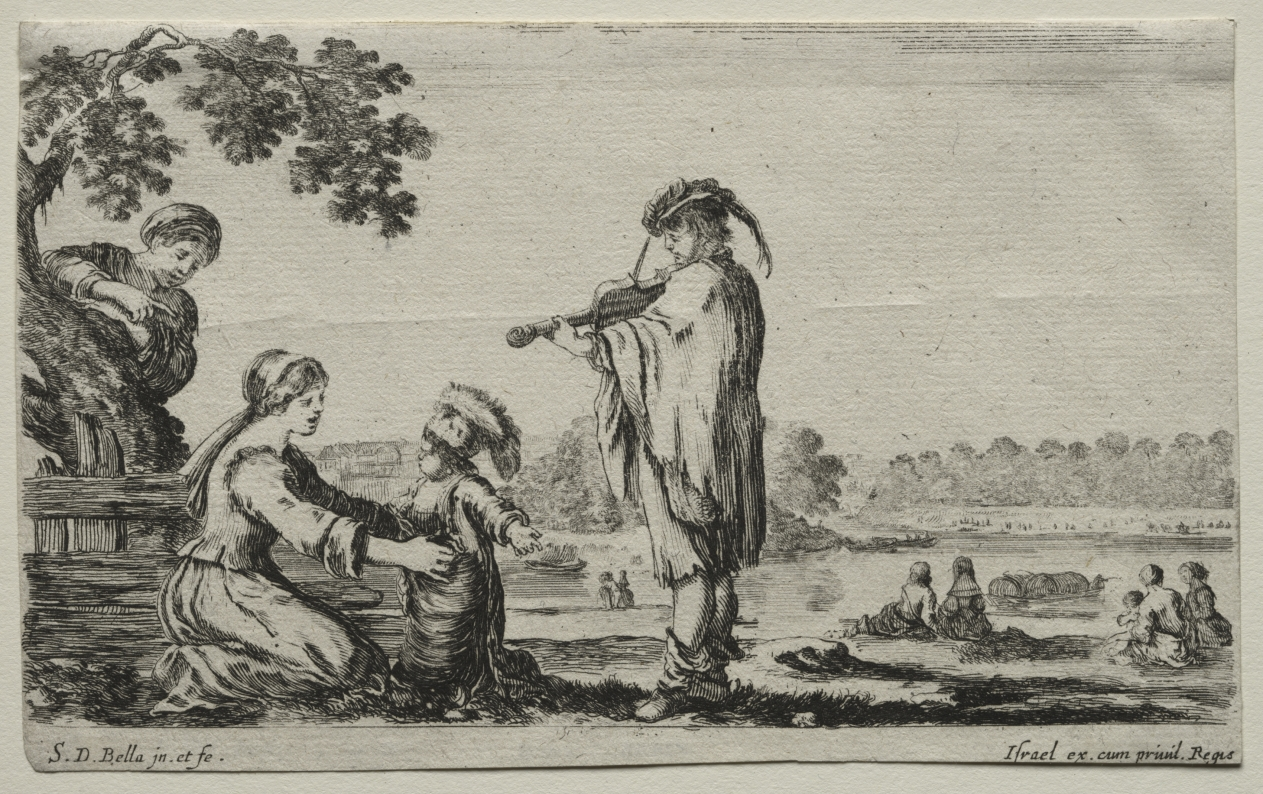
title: Various Figures and Landscapes: A Violin Player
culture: Italy, 17th century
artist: Stefano Della Bella (Italian, 1610–1664)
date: 1649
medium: etching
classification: Print